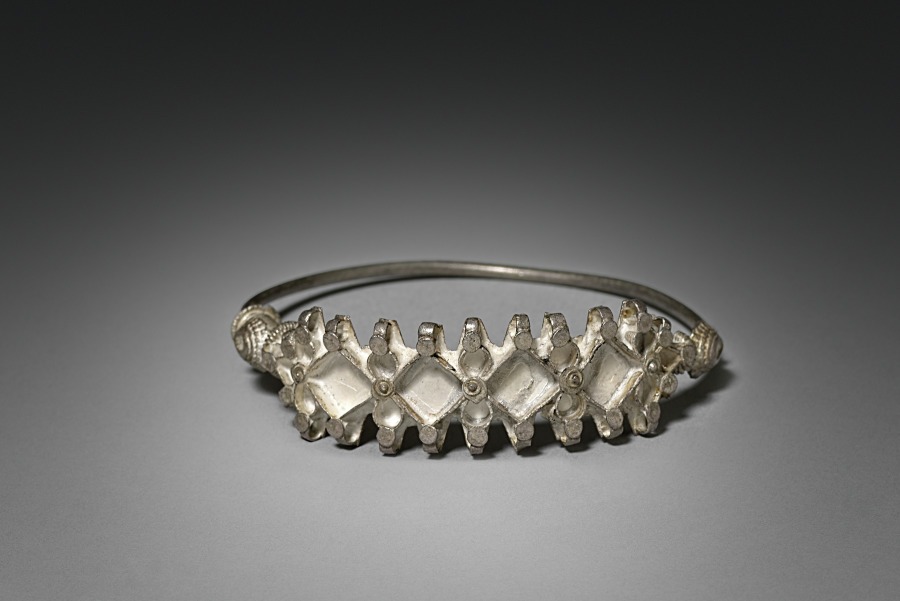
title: Nose Ring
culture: India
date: early 1900s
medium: silver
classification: Jewelry